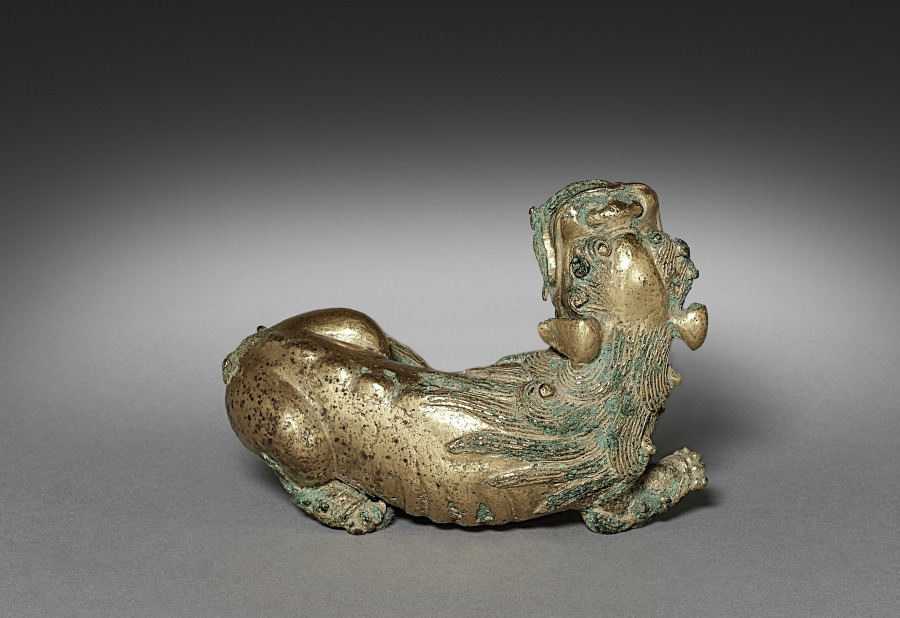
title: Dog-shaped Paperweight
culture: Korea, Unified Silla period (676-935)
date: 676–935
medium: gilt bronze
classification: Sculpture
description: This small object in the shape of a hybrid dog-lion is believed to have been used as a paperweight. Since the Three Kingdoms period (57 BC−668), mercury amalgam gilding had been widely employed to embellish metal objects as well as to make their surface resistant to acids. This technique involves mixing pure gold powder with liquid mercury to form a paste-like mixture. As heat is applied, the mercury evaporates, but an opaque layer of gold remains on the surface. This coating must be polished by first rubbing it with dried rice seedlings, then processing it in ash lye to eliminate impurities; next, the piece is washed and rinsed in a plum vinegar bath.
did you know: This is a dog and lion hybrid.